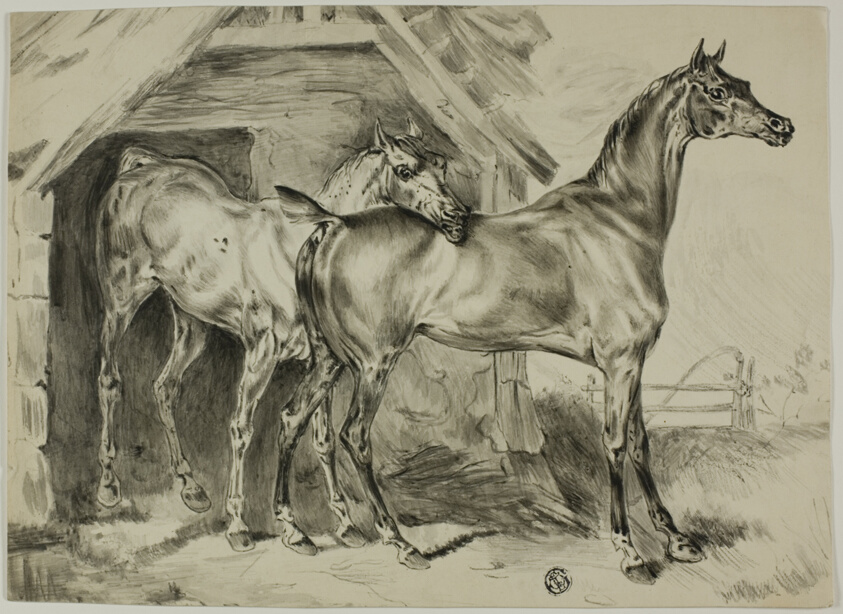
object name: Drawing and Watercolor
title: Standing Mare and Colt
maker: Unknown Artist; European, n.d.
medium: Brush and black and gray wash, over graphite, on cream wove paper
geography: Europe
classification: ink or chalk wash; drawings (visual works); prints and drawing